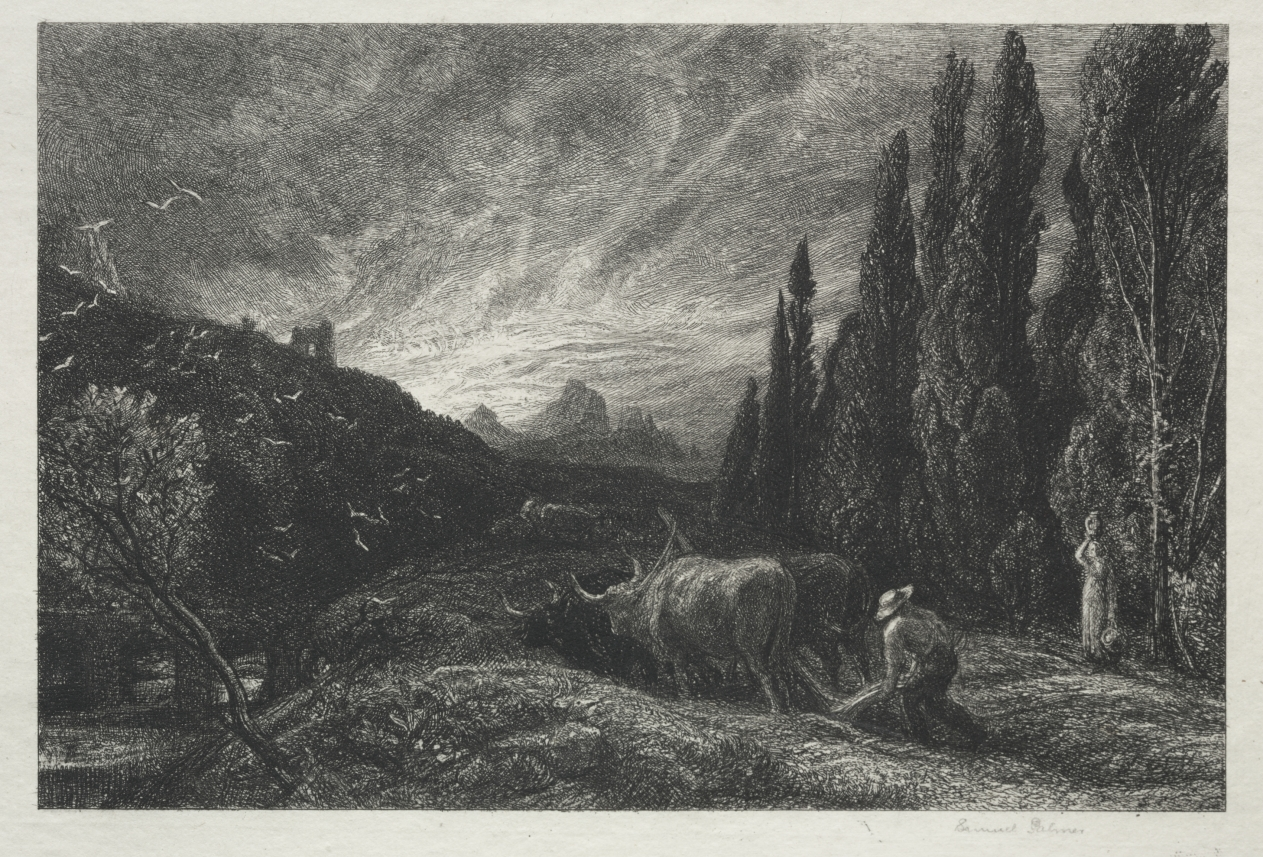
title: The Early Ploughman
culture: England, 19th century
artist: Samuel Palmer (British, 1805–1881)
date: 1861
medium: etching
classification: Print